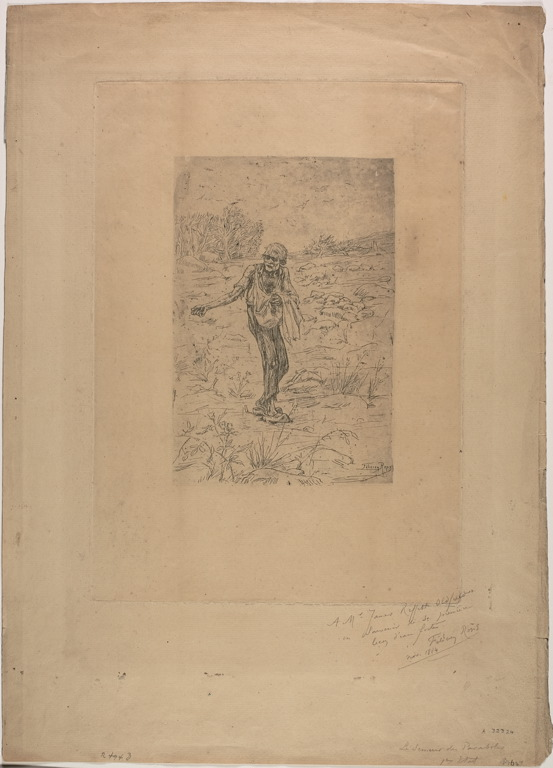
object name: Drawing and Watercolor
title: Invitation to a concert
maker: Félicien Rops (Belgian, 1833-1898)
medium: Pen and black ink on cream paper, tipped onto blue-green wove paper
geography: Belgium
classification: pen and ink drawings; drawings (visual works); prints and drawing